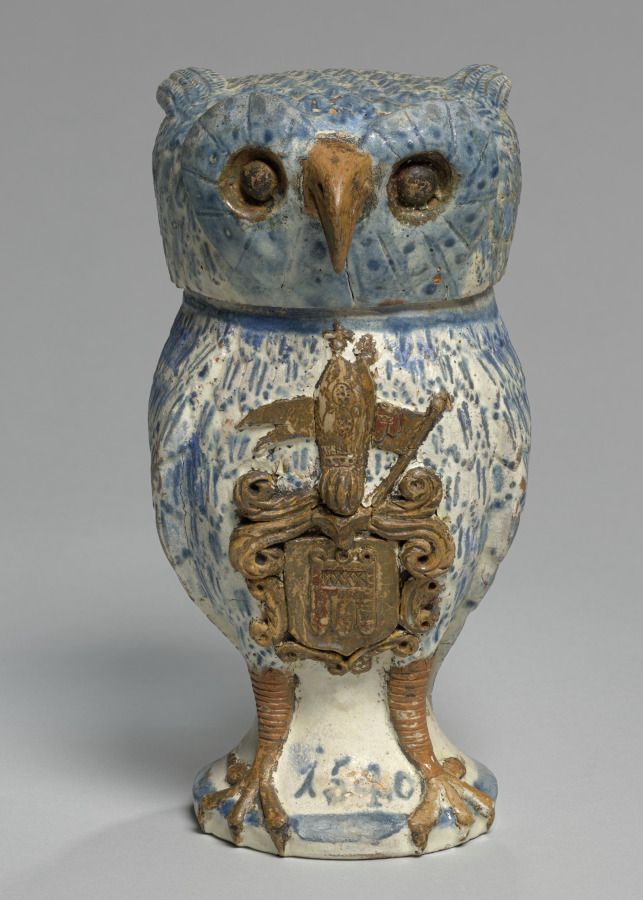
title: Owl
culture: Southern Germany, 16th century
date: 1540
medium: faience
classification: Ceramic